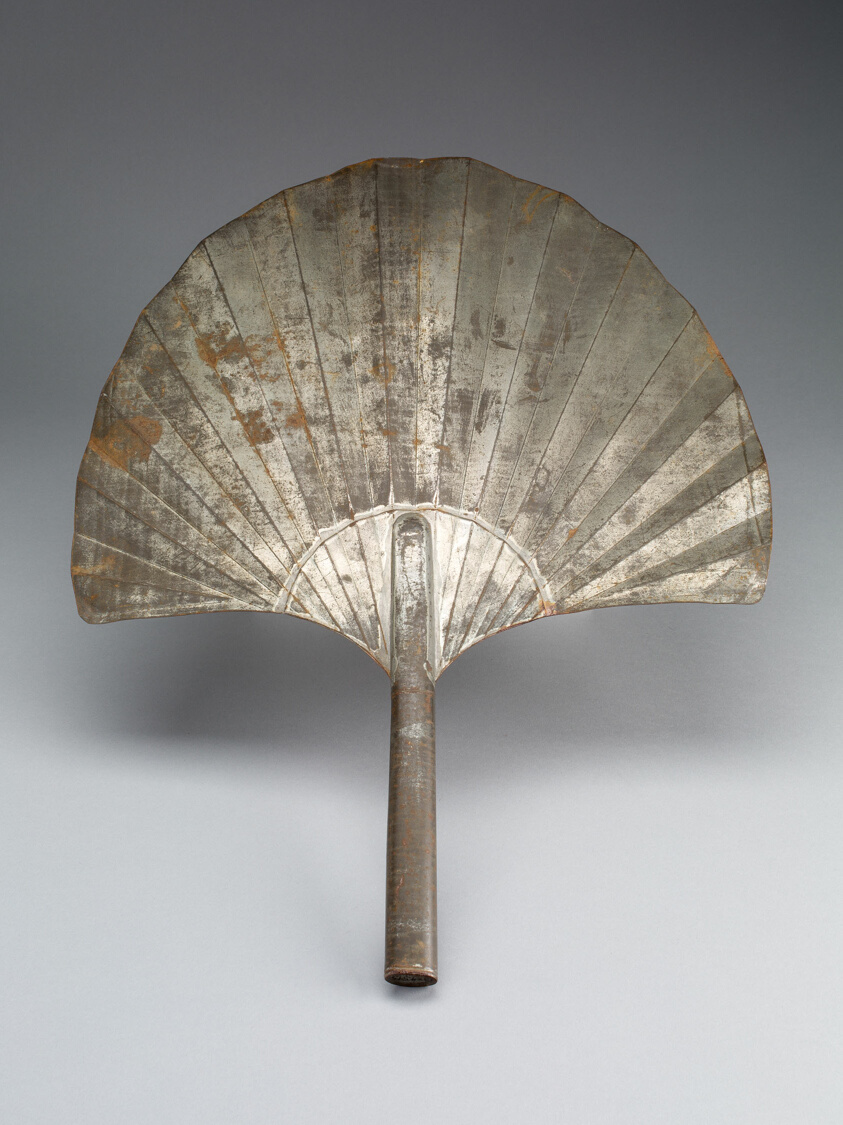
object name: Decorative Arts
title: Fan (Anniversary Tin)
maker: Artist unknown (American, 19th century)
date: 1850–1900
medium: Tin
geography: United States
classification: metalwork; american decorative arts; american arts; decorative arts